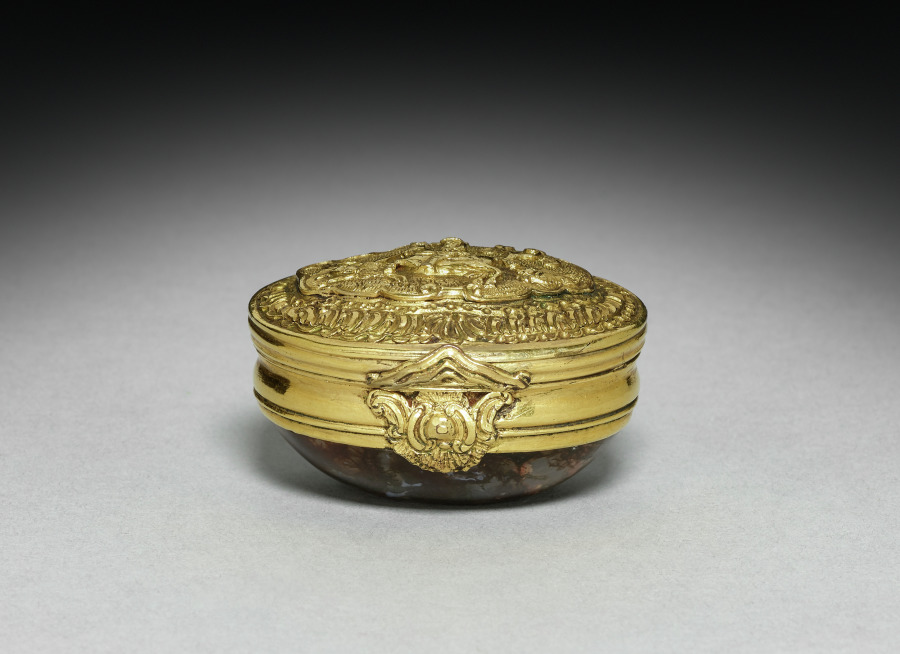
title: Box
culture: Germany, 18th century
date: 1730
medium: agate and gold or gilt metal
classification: Miscellaneous